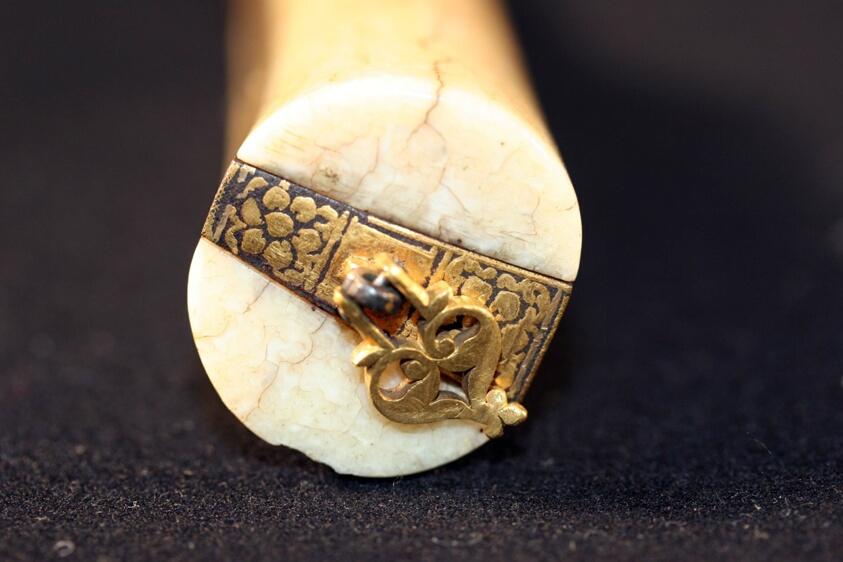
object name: Armor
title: Knife (Kard) with Battling Elephants, Rhinoceros and Lions on the sheath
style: South Asian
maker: India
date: 18th century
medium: Watered steel, ivory, and pierced and chased gold, wood and velvet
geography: India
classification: edged weapon-sword; armor